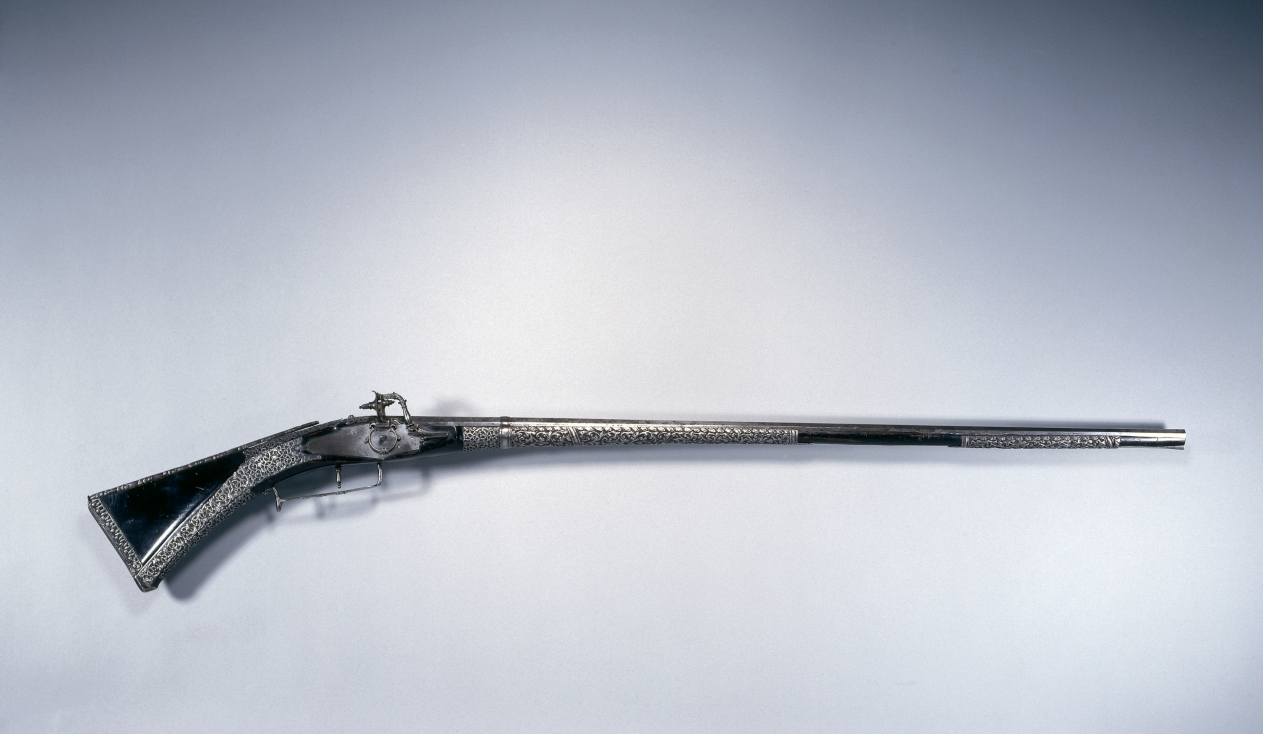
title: Wheel-Lock Hunting Rifle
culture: Italy, Sardinia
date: c. 1650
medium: steel; pierced and chiseled mounts, walnut stock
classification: Arms and Armor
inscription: Inscribed: (on Barrel): A PATIS AND PEVRVV ET FILS [partially indecipherable]